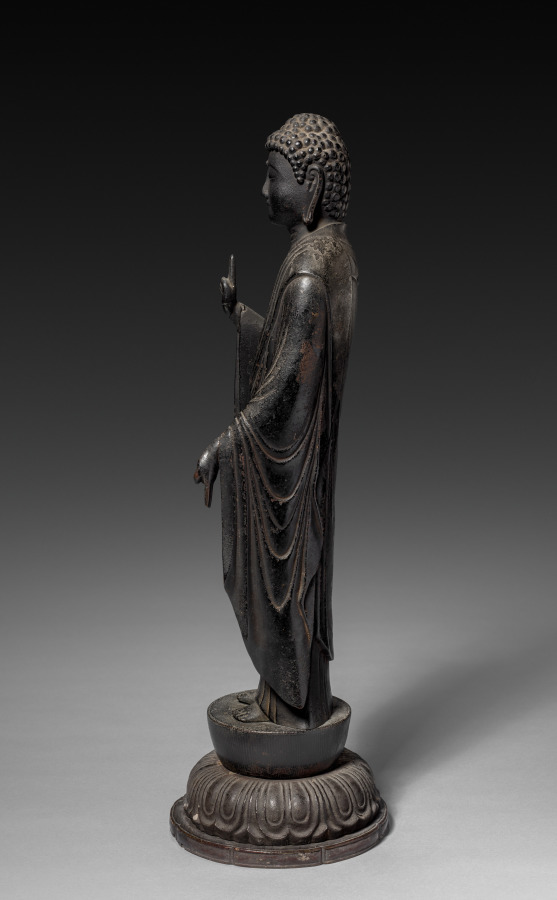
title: Amida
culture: Japan, Kamakura period (1185–1333) to Nanbokuchō period (1336–92)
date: 1300s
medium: patinated bronze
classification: Sculpture